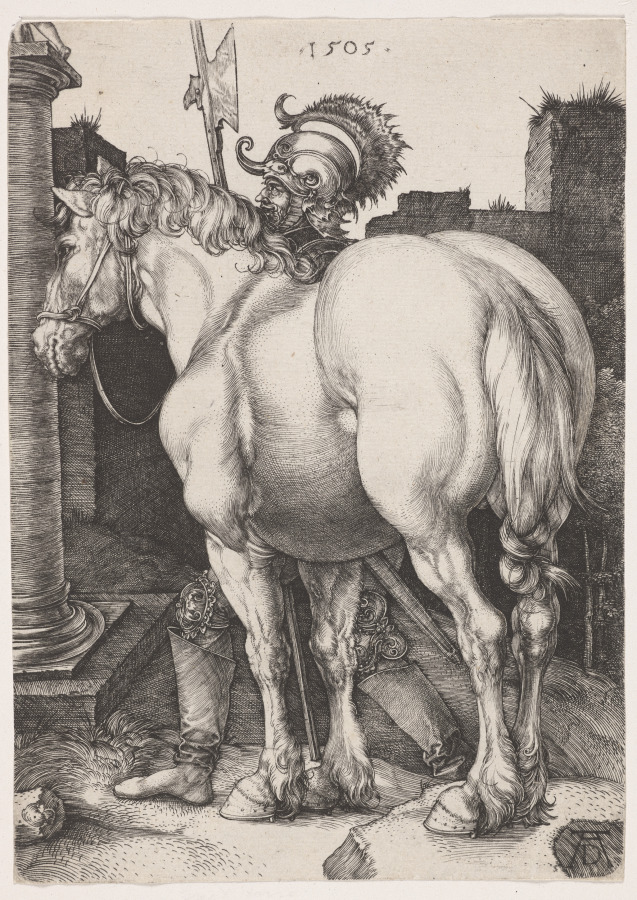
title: The Large Horse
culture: Germany, early 16th Century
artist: Albrecht Dürer (German, 1471–1528)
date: 1505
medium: engraving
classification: Print